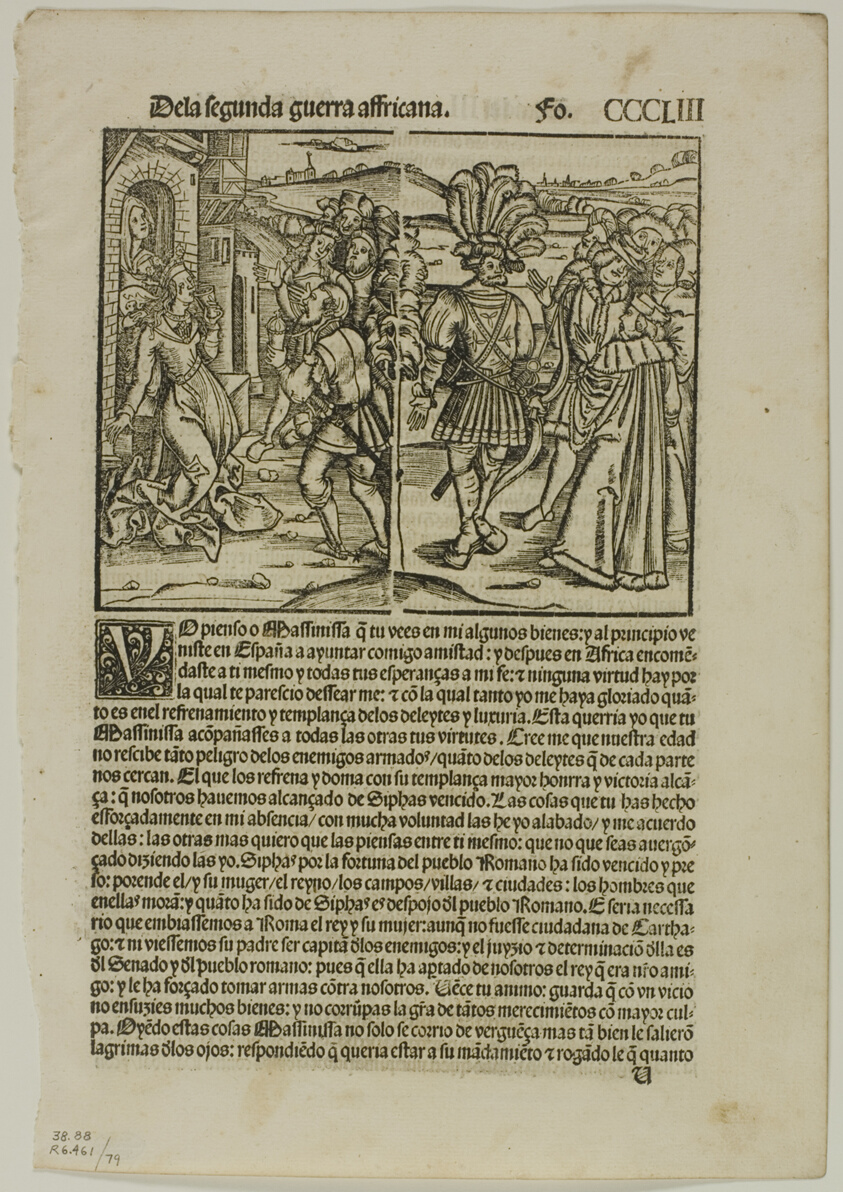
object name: Print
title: Illustration from Decadas, plate 79 from Woodcuts from Books of the XVI Century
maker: Unknown Artist (German, 16th century); assembled by Max Geisberg (Swiss, 1875-1943)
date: 1520, assembled into portfolio 1937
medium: Woodcut on paper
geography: Germany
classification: woodcut; print; prints and drawing